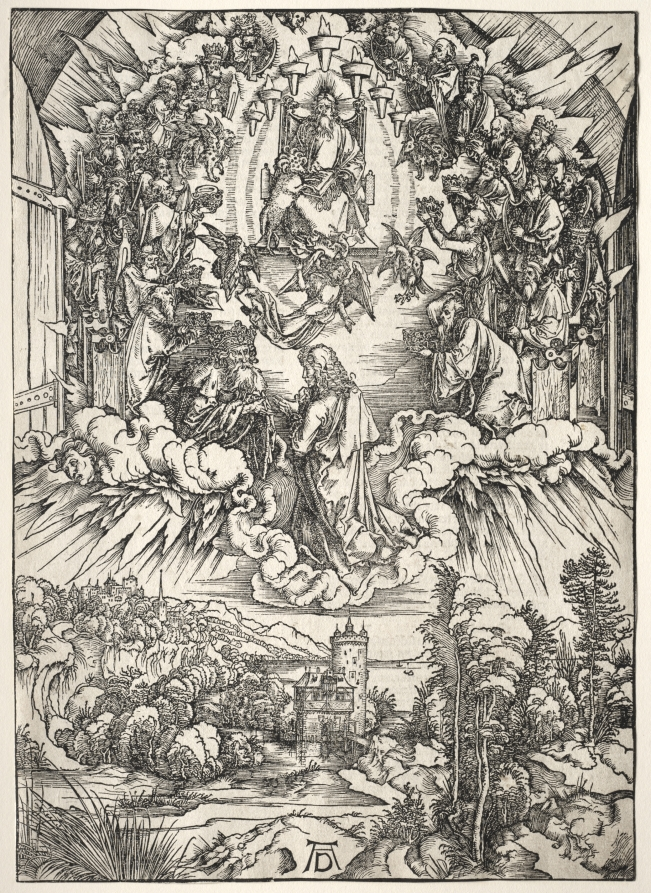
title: Revelation of St. John: St. John before the Throne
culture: Germany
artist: Albrecht Dürer (German, 1471–1528)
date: 1511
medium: woodcut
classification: Print